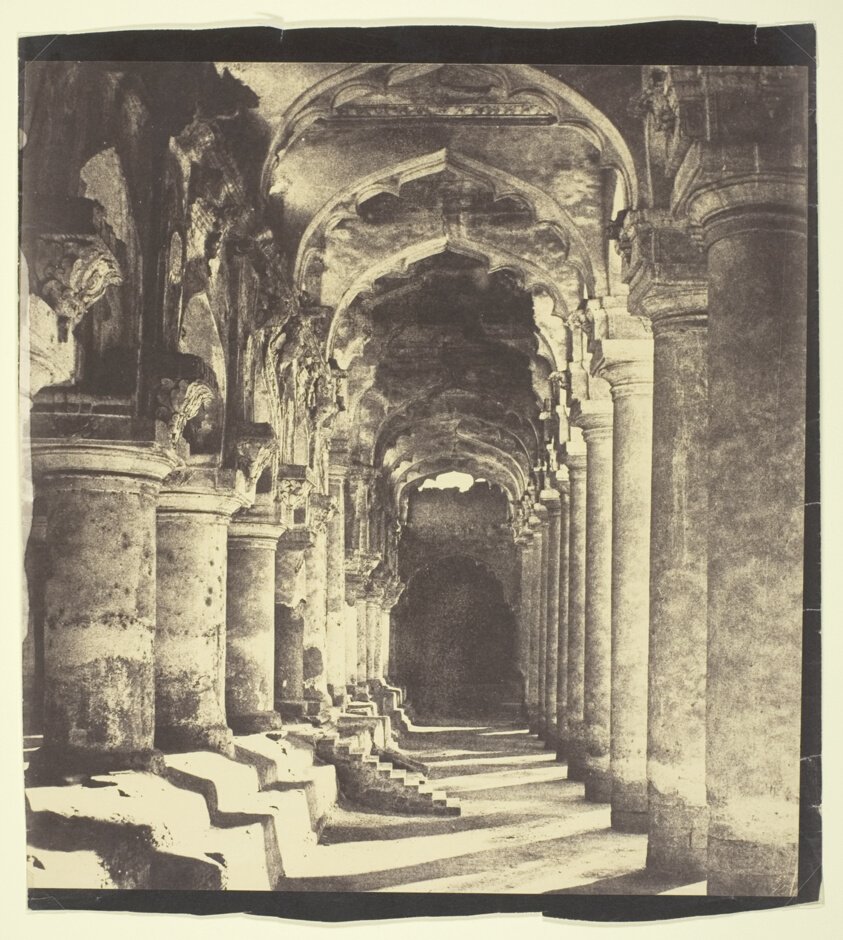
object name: Photograph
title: Arcade in Quadrangle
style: 19th century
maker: Linnaeus Tripe (English, 1822-1902)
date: 1858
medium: Salted paper print or diluted albumen print from calotype negative, plate III from Photographic Views in Madura, part IV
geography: England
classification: albumen silver print; photographic process; photography; photograph